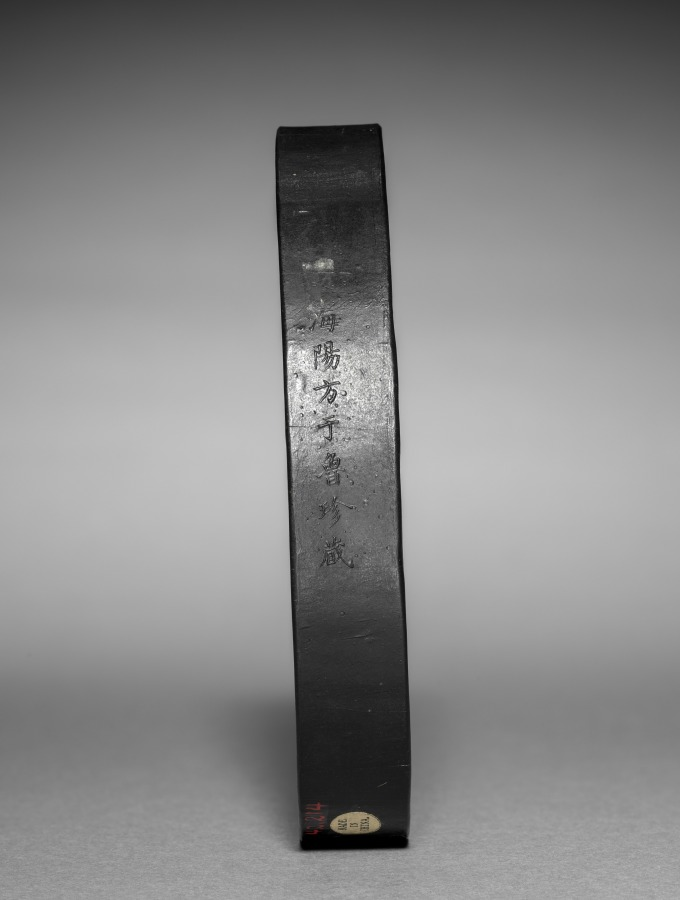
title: Ink Cake with One Hundred Children at Play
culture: China, Ming dynasty (1368–1644)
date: 1368–1644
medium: molded ink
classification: Miscellaneous